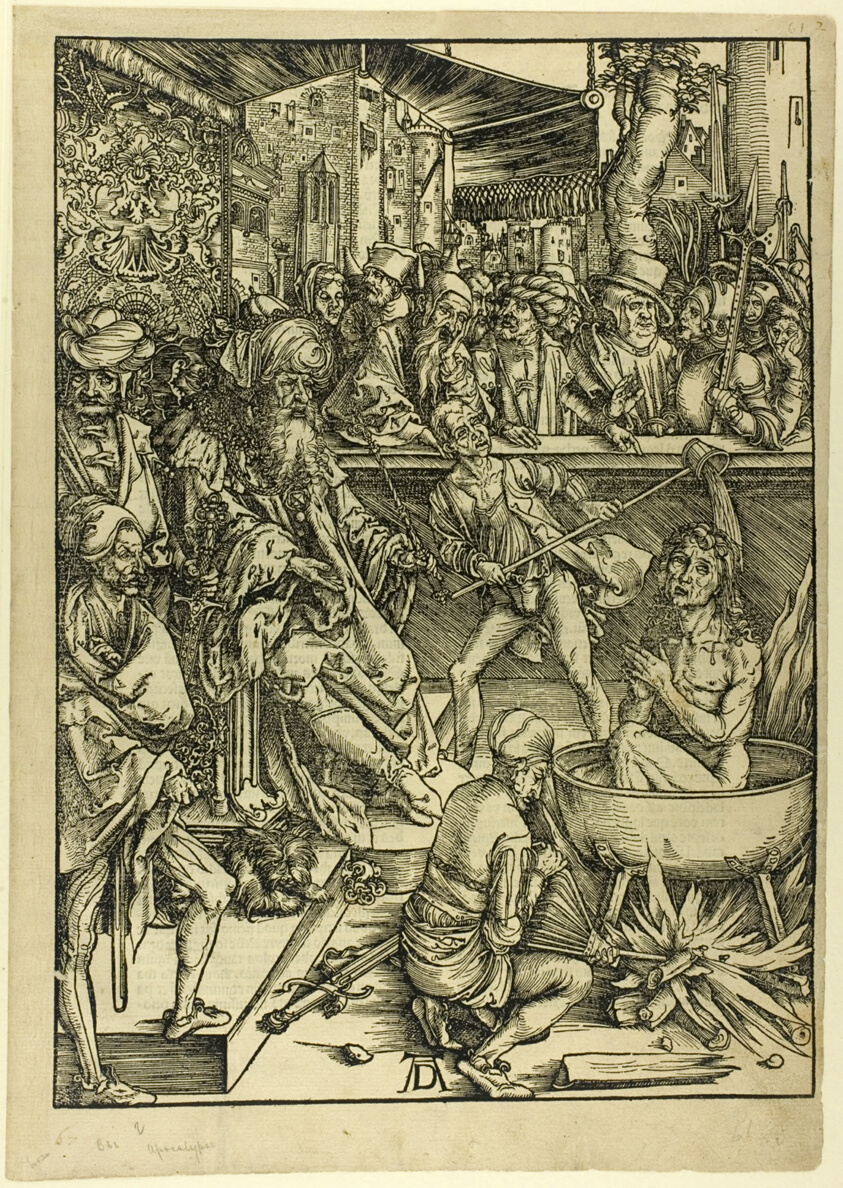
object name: Print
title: The Martyrdom of St. John, from The Apocalypse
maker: Albrecht Dürer (German, 1471-1528)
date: c. 1496–98, published 1511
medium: Woodcut in black on tan laid paper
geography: Germany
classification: woodcut; print; prints and drawing; paper